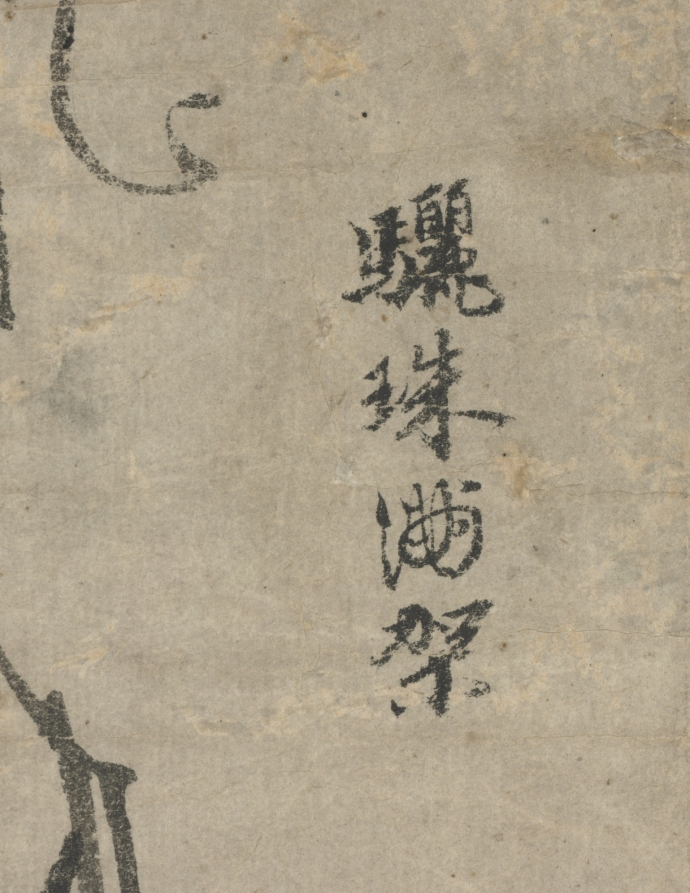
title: Grapes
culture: Japan, Edo period (1615–1868)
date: 1615–1868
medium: hanging scroll; ink on paper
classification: Painting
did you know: The amateur painter of this work attempted to follow the model of grapevine paintings produced in Korea.